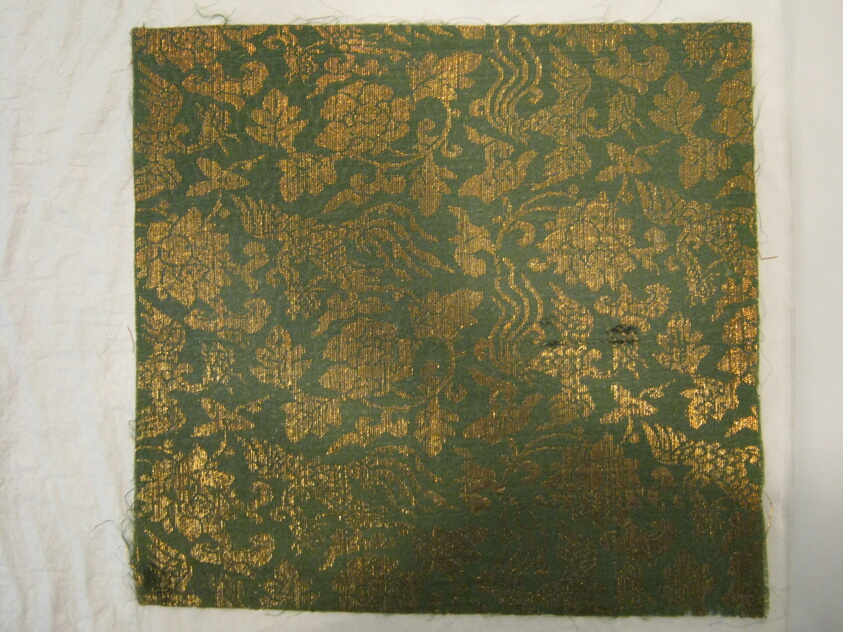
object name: Textile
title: Fragment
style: edo (japanese period)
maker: Japan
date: 18th/19th century, Edo period (1615–1868)/ Meiji period (1868–1912)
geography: Japan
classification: textile; weaving